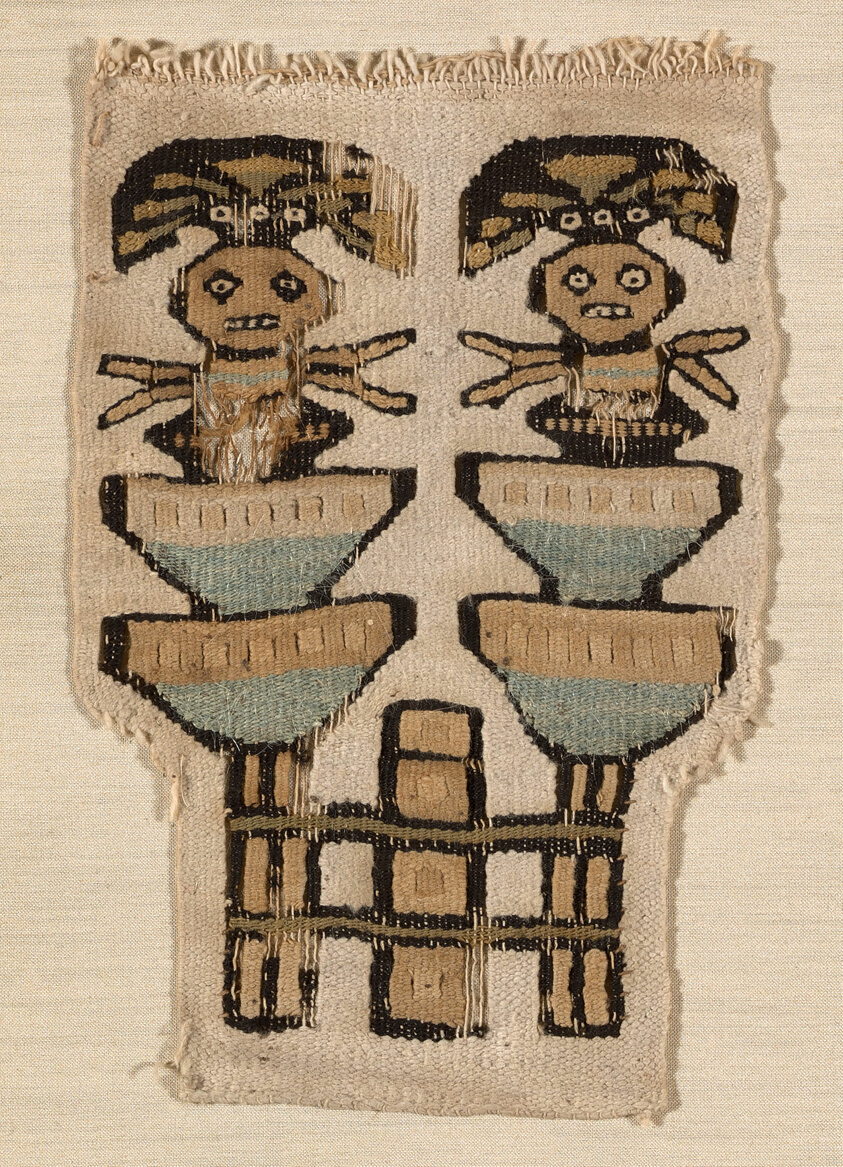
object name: Textile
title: Patch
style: lambayeque, Pre-Columbian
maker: Lambayeque (Peru, Probably north coast)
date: A.D. 1000/1476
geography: Peru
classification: textile; weaving